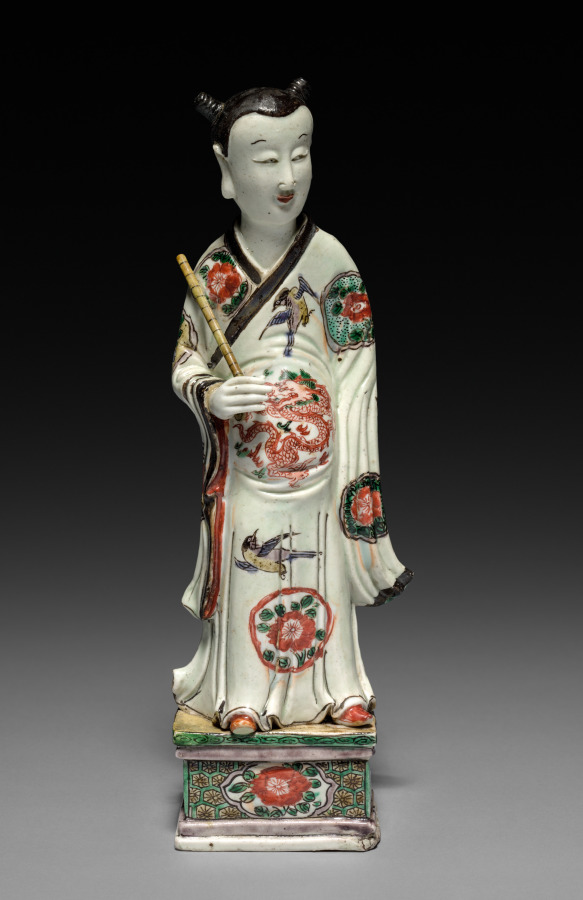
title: Daoist Immortal Han Xiangzi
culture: China, Jiangxi province, Jingdezhen kilns, Qing dynasty (1644-1911), Kangxi reign (1662-1722)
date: 1662–1722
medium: porcelain with famille verte overglaze enamel decoration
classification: Ceramic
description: One of the Eight Immortals, Han Xiangzi was said to be the nephew of the famous Tang dynasty poet Han Yu (768–824). He is usually shown as a young boy holding a flute. Han is wearing a white robe decorated with peonies, hinting at his identity as the patron of florists and his legendary ability to make peonies bloom in winter. A four-clawed dragon, a decorative motif typically used for imperial nobility and certain high-ranking officials, decorates Han’s robe.